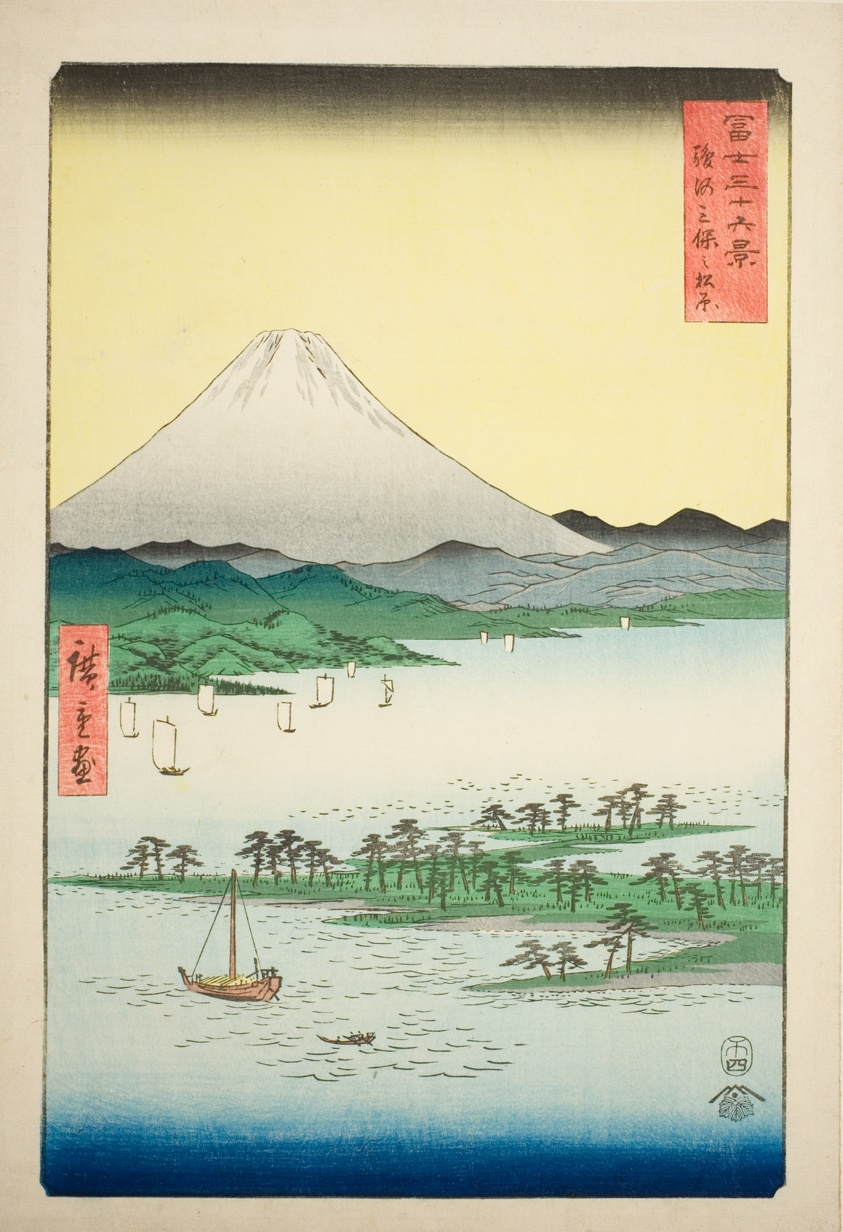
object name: Print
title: Pine Beach at Miho in Suruga Province (Suruga Miho no matsubara), from the series "Thirty-six Views of Mount Fuji (Fuji sanjurokkei)"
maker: Utagawa Hiroshige 歌川 広重; Japanese, 1797-1858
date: 1858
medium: Color woodblock print; oban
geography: Japan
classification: woodblock print; print; asian art